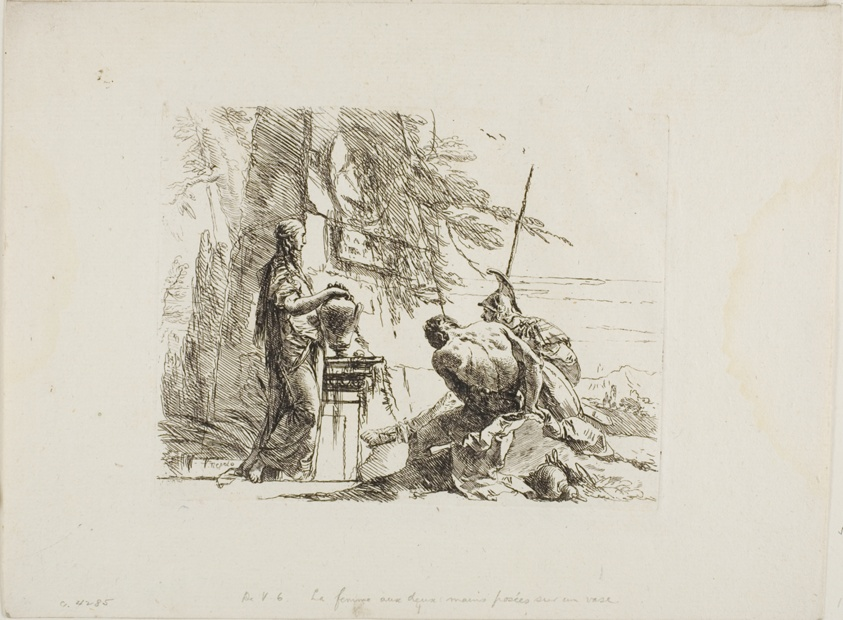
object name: Print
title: A Woman with her Hands on a Vase, Soldier, and Slave, from Capricci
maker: Giovanni Battista Tiepolo (Italian, 1696–1770)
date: 1740/50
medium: Etching on paper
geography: Italy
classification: etching; print; prints and drawing